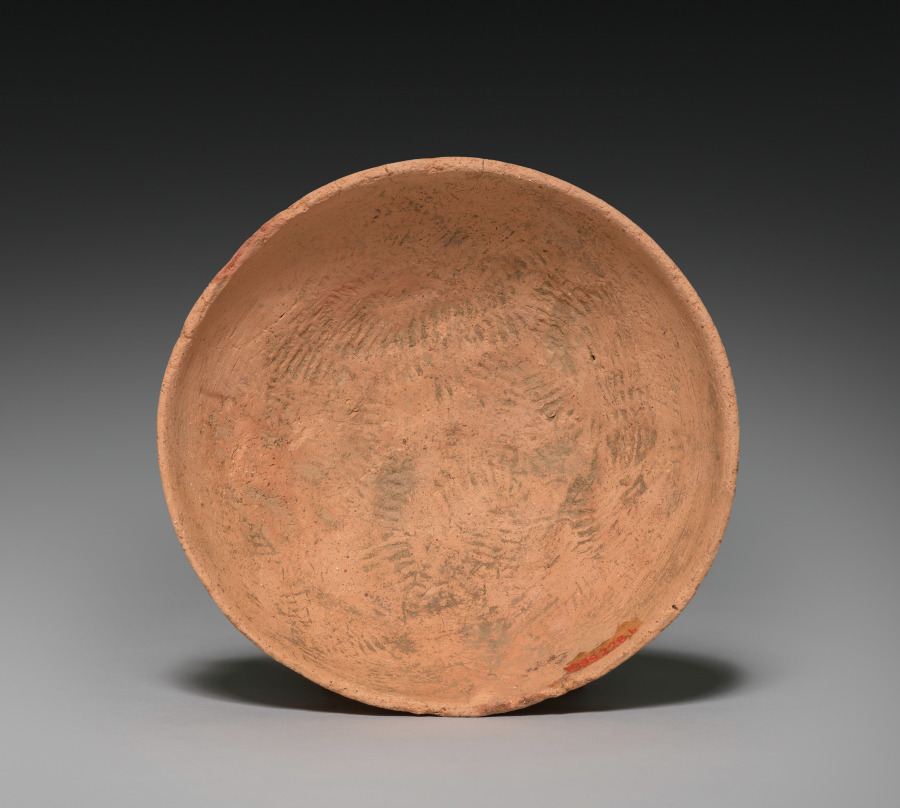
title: Lidded Vessel with Loop Handles (lid)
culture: Korea, Iron Age (c. 300–57 BCE)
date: 300–1 BCE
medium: earthenware, with impressed, paddled, and incised decoration and red slip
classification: Ceramic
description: This small storage jar was hand built from coils of clay before it was finished on a potter's wheel. The thick, vertical ridges covering the surface were impressed into the wet clay using a carved wooden paddle. This network of raised lines was then intersected by four incised lines coursing around the bulbous form and separating the body into lower and upper areas with deft visual simplicity. Such direct, effective design solutions to ceramic decoration appear frequently in early Korean ceramics. The two perforations in the upper body were no doubt used to help secure the lid to the body with a cord.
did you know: Closed kilns built on hills became widely used for producing this type of pottery vessel in Korea during the Three Kingdoms period.